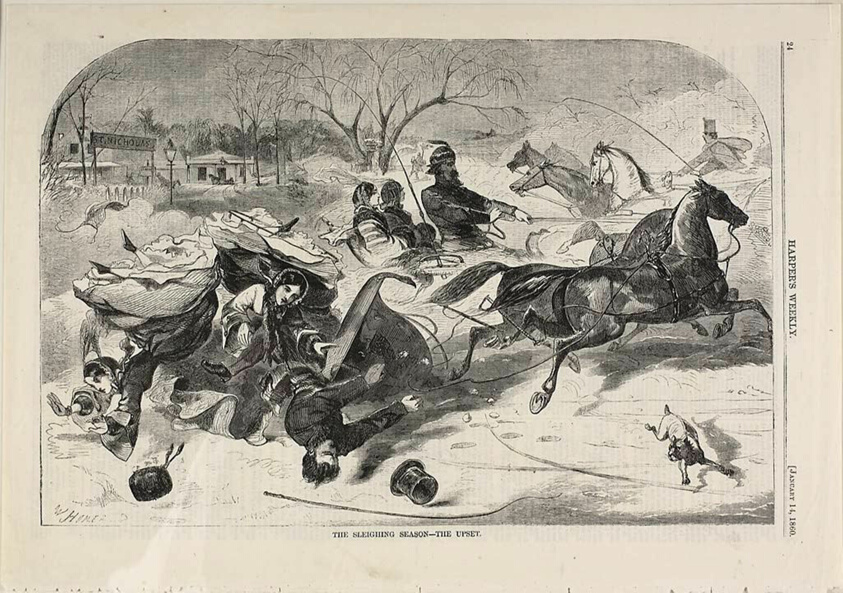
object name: Print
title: The Sleighing Season—the Upset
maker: Winslow Homer (American, 1836-1910); published by Harper's Weekly (American, 1857-1916)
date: published January 14, 1860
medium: Wood engraving on paper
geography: United States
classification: wood engraving; print; prints and drawing